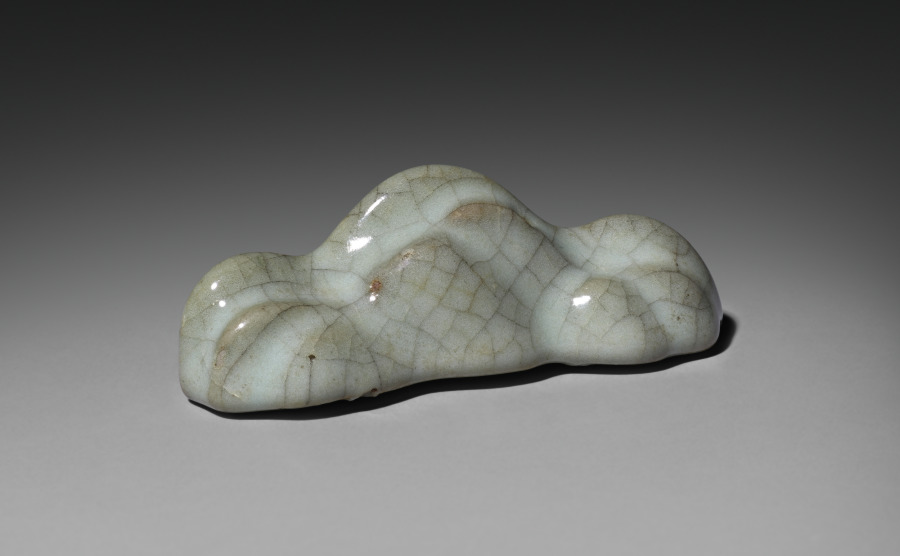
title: Brush Rest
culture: Southeast China, Zhejiang province, Southern Song dynasty (1127–1279)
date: 1127–1279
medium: glazed stoneware, Guan ware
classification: Ceramic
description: This brush rest, shaped like a mountain range, is covered with a thick and soft gray-blue crackled Guan ware glaze that pools in the deeper areas, giving the mountain range a hazy appearance as if enshrouded in white mists. Guan ware was produced in the imperial kilns in Hangzhou, the Southern Song dynasty capital.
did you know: There are twelve "hills" on this mountain-shaped brush rest.